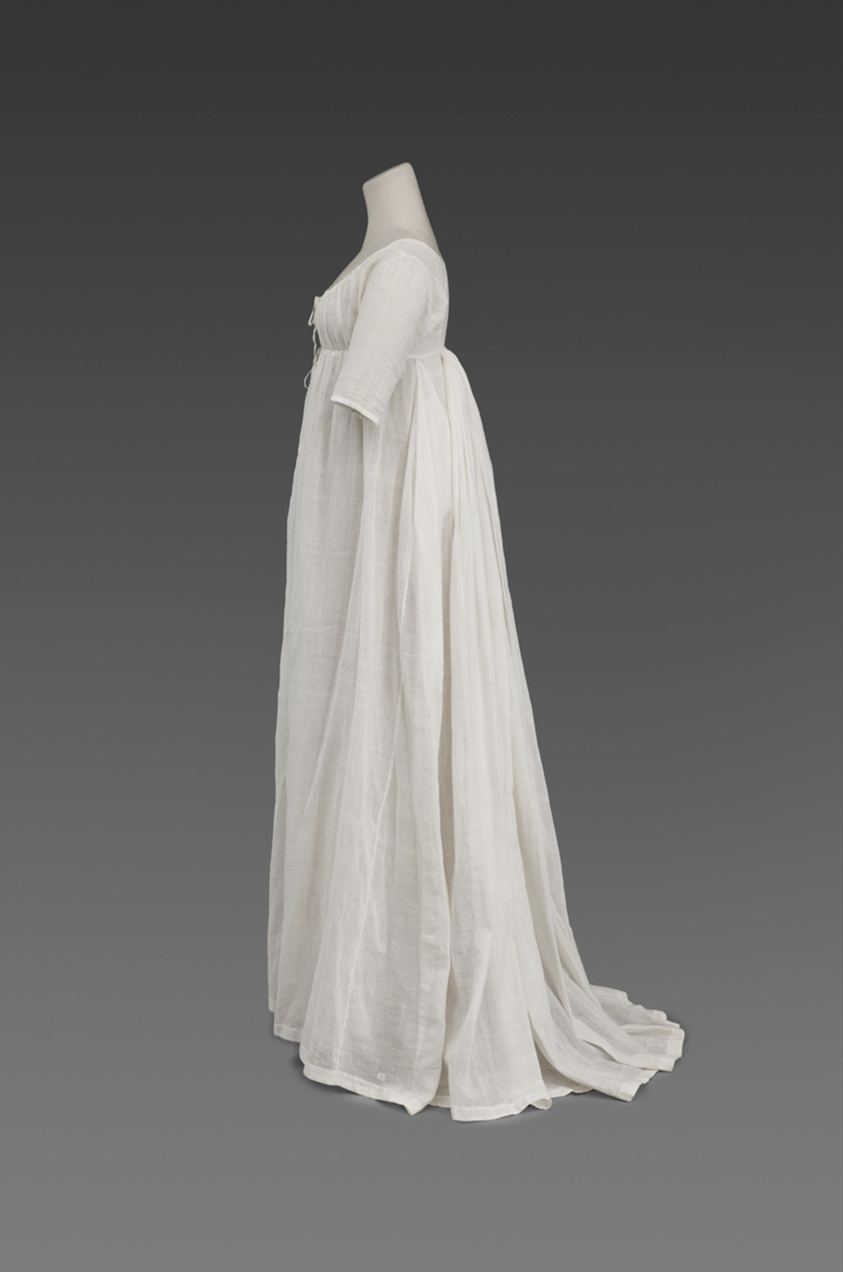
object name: Costume and Accessories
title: Woman's Day Dress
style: Neoclassicism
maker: Made in France with cotton imported from India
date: c. 1800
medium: Cotton, hand-spun, hand-woven plain weave called mulmul or muslin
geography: India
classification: costume; dress (garment); clothing; garment; textile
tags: dresses, fashion, garment, clothing, costume